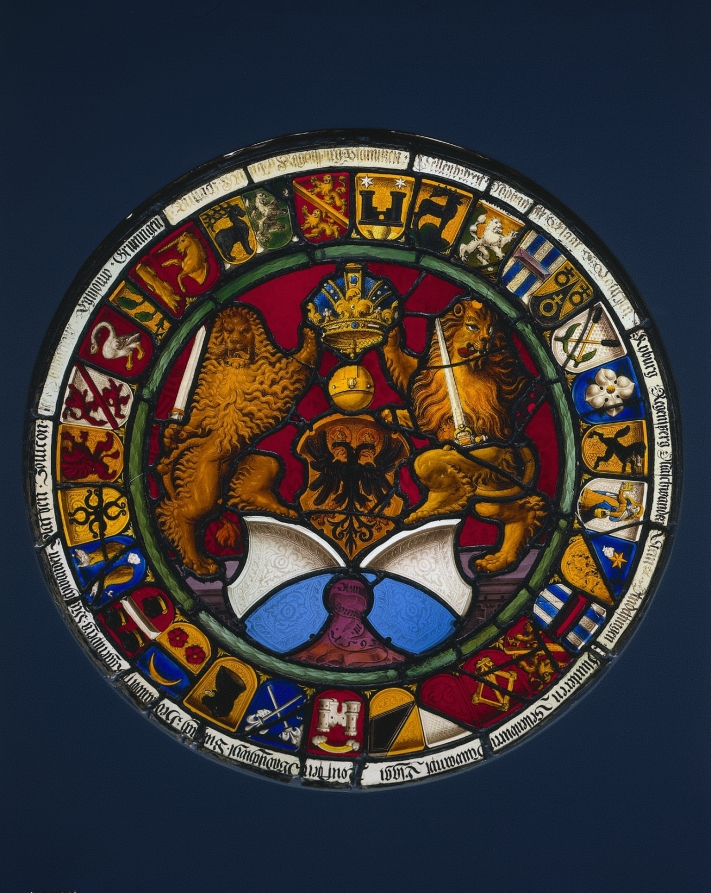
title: Heraldic Roundel with Arms of the Canton of Zürich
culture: Switzerland, Zurich, late 16th Century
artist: workshop of Hans Rütter (Swiss, 1550–1610)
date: 1593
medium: white glass with silver stain and pot metal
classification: Glass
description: The large shield at center incorporating the double eagle (insignia of the Holy Roman Empire) is surrounded by thirty small shields-those of the wards of the city of Zurich. In the late 1400s, it was customary for neighboring Swiss towns and cantons to exchange panels of stained glass to promote closer political relationships.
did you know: The coats-of-arms of 31 different Swiss towns and provinces are shown in the outer ring of this stained glass roundel. If you look closely, you can see flowers, lions, and a unicorn. What symbols would you choose for your own coat-of-arms?